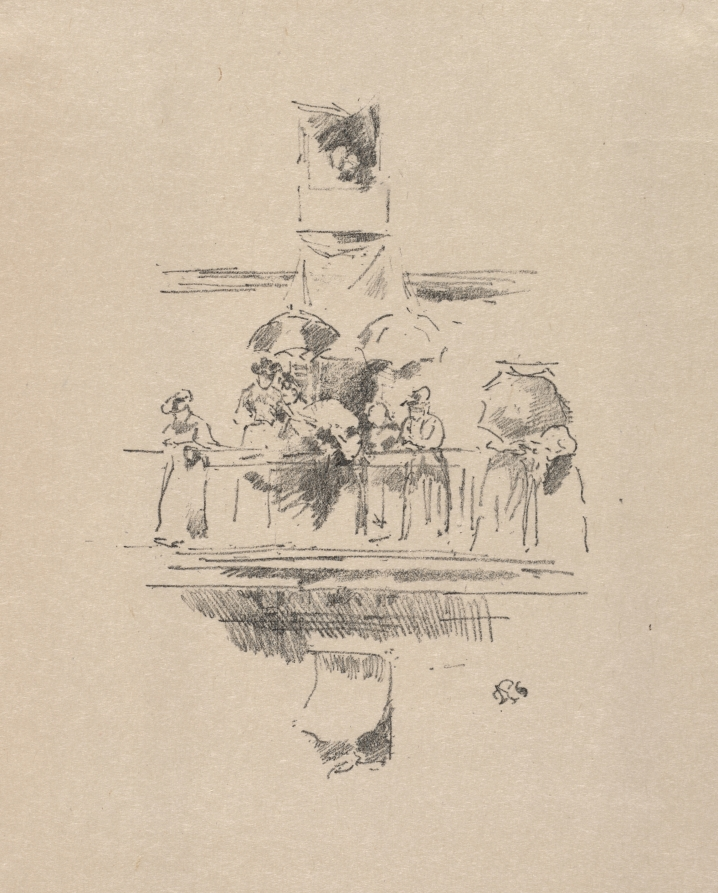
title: The Little Balcony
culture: America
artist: James McNeill Whistler (American, 1834–1903)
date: 1894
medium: lithograph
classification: Print